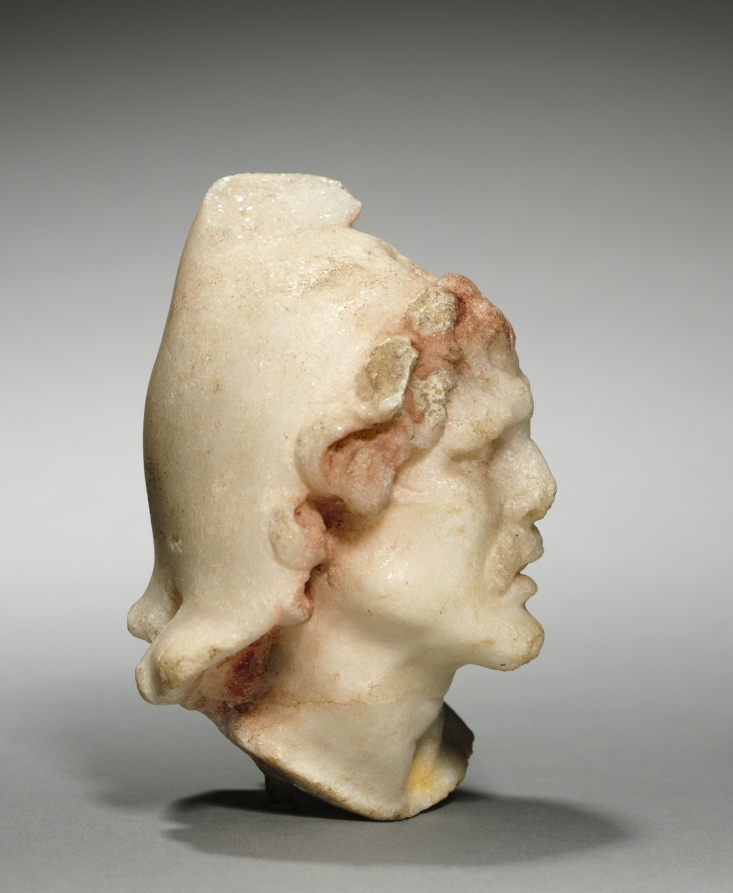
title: Head of a Foreign Warrior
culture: Greece, Alexandria or the Levant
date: 300–200 BCE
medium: marble with traces of paint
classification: Sculpture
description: This miniature head depicts a man with wild curls that still retain their original red pigment. He is immediately revealed as a non-Greek by his carved mustache, associated with Celtic tribes, and cone-shaped hat called a Phrygian cap, associated with eastern peoples such as the Persians. During the Hellenistic period, various non-Greek peoples served as mercenaries or fought against the Greek kingdoms, and these foreign warriors were depicted extensively in art.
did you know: There is a small notch below the cap's crest that likely held an attachment, now lost.